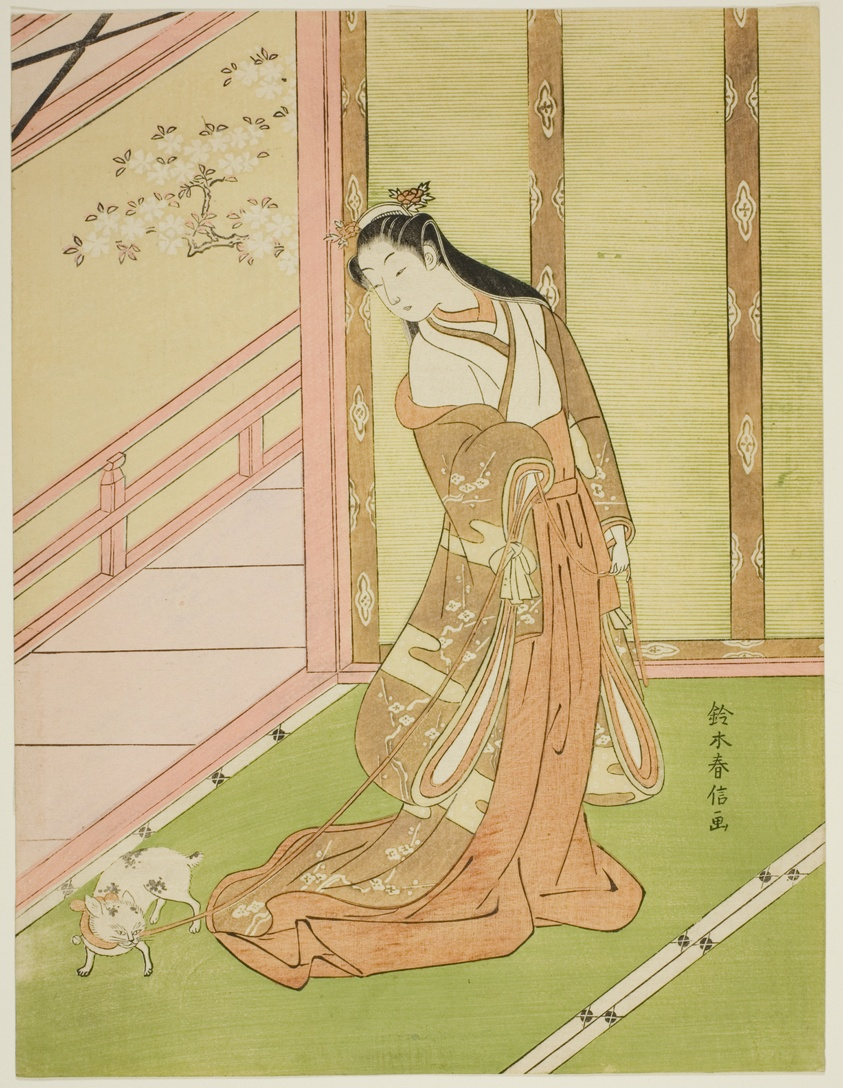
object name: Print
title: The Third Princess and Her Pet Cat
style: Japanese (culture or style)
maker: Suzuki Harunobu 鈴木 春信; Japanese, 1725 (?)-1770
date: c. 1767/68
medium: Color woodblock print; chuban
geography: Japan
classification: woodblock print; print; asian art